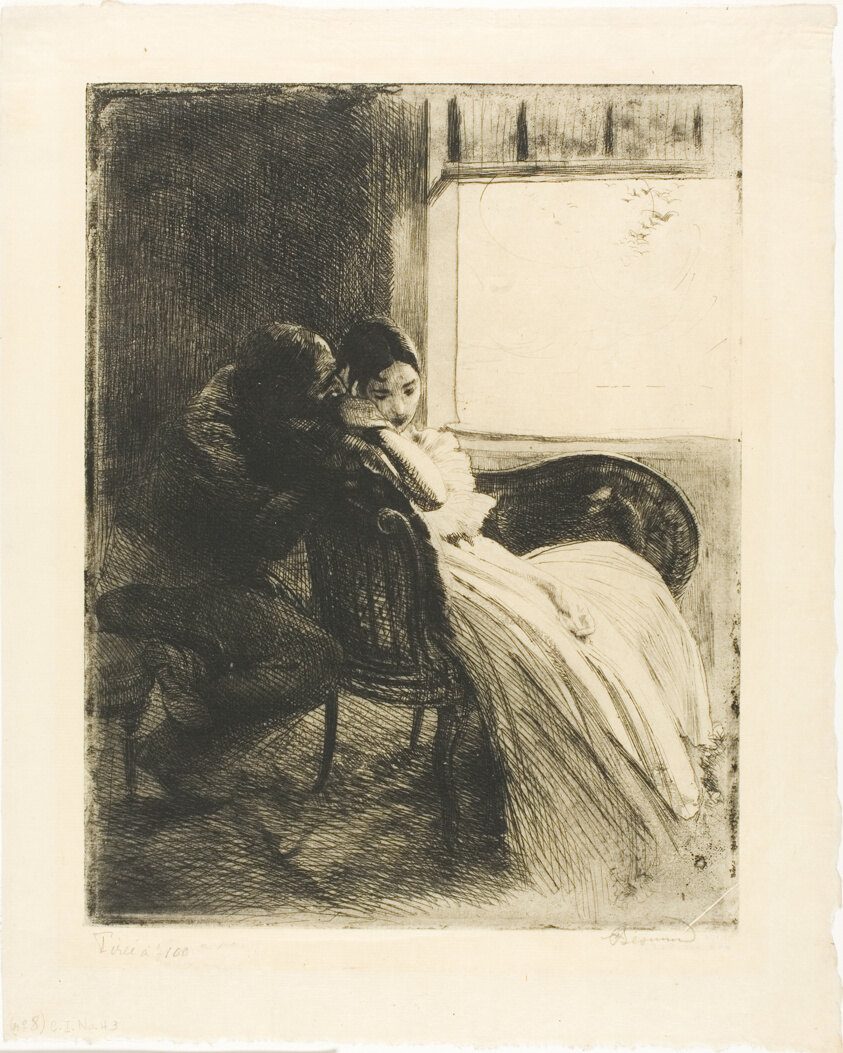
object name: Print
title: Flirtation, plate six from Woman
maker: Albert Besnard (French, 1849-1934)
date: c. 1886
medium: Etching, aquatint and drypoint on cream Japanese paper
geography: France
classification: etching; print; prints and drawing